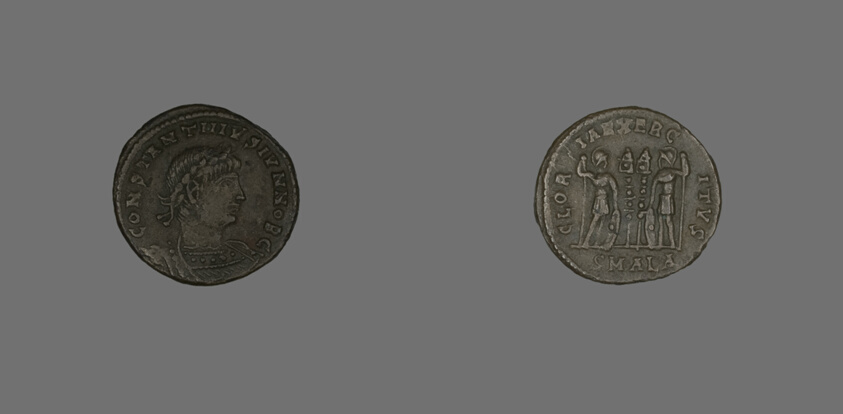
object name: Coin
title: Follis (Coin) Portraying Emperor Constantine II as Caesar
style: greco-roman (egyptian)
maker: Roman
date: 333-335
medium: Bronze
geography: Alexandria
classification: coin; ancient art